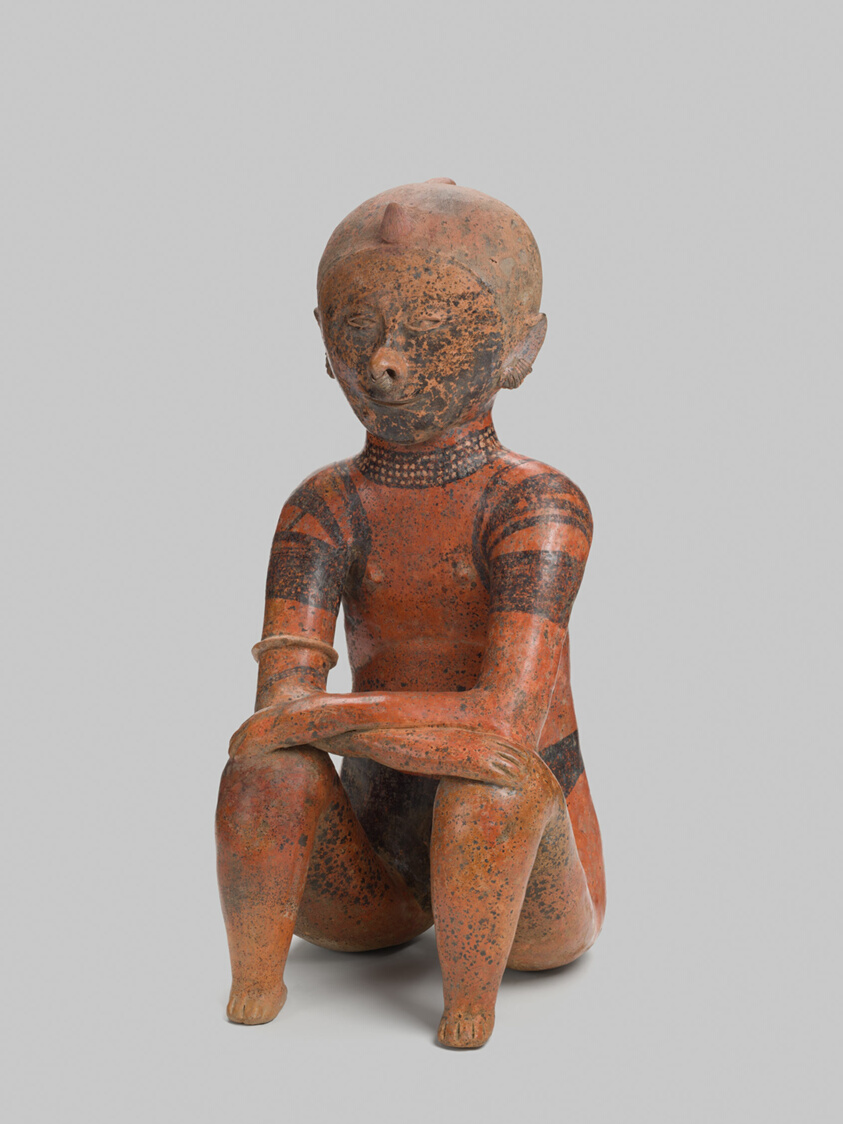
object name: Sculpture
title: Figure of a Seated Chieftain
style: nayarit, west mexico, mesoamerican, lagunillas, americas, Arts of the Americas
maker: Nayarit (Lagunillas area, Nayarit, Mexico)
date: 100 BCE–250 CE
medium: Ceramic and pigment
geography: Nayarit state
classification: ceramics; earthenware; art of the americas; sculpture; funerary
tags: people, offering, ancestors, rulers (people), rulership, tattoos